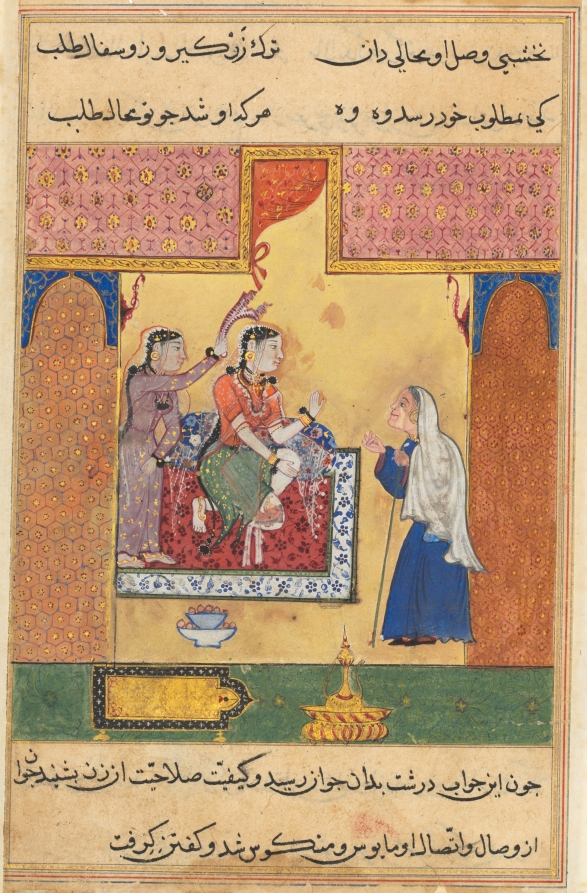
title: The old procuress conveys the young man’s message of love to Mansur’s wife, from a Tuti-nama (Tales of a Parrot: Seventeenth Night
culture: Mughal India, court of Akbar (reigned 1556–1605)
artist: Sravana (Indian)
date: c. 1560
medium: gum tempera, ink, and gold on paper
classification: Painting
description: When a lascivious young man learns of the beauty and virtue of the merchant Mansur’s wife, he becomes obsessed with her. While Mansur is away on a long journey, the man decides to profess his love for the woman through a messenger. Here Mansur’s wife, seated on an arabesque-patterned carpet, rebuffs the young man’s advances and sends the procuress away.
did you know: The golden mihrab next to vessels for ritual cleansing points toward Mecca, emphasizing the wife’s piety.